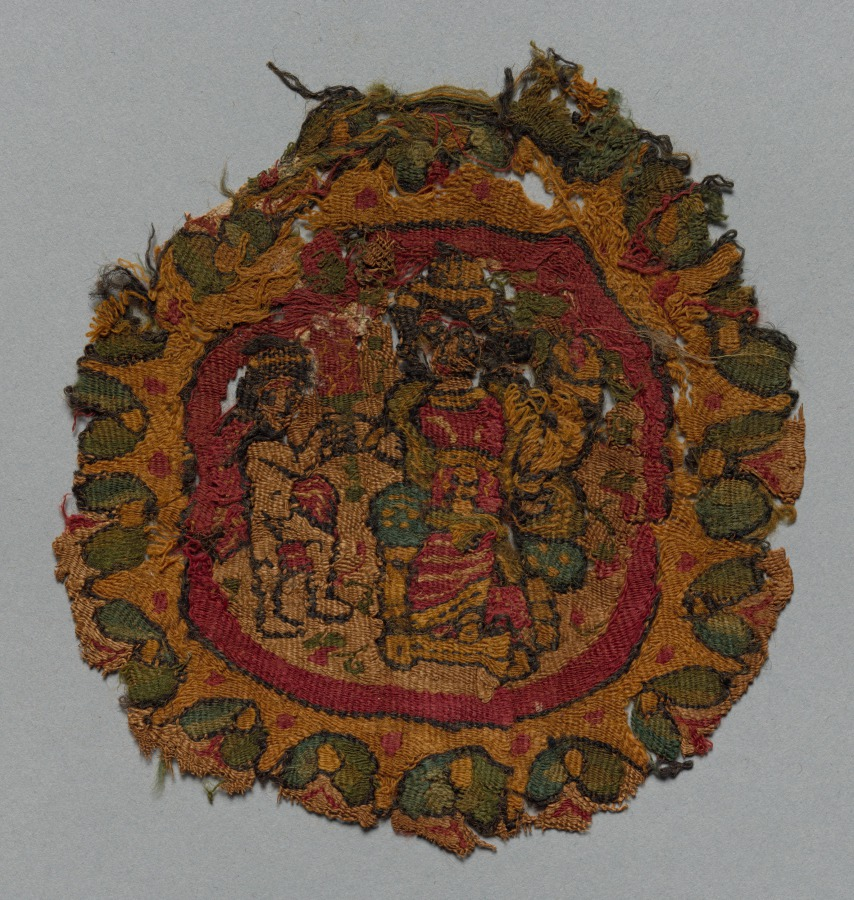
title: Fragment from a Segmentum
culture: Egypt, Umayyad period (661–750) or Abbasid period (750–1258)?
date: 700s - 800s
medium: tapestry (originally inwoven in tabby ground); wool and linen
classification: Textile